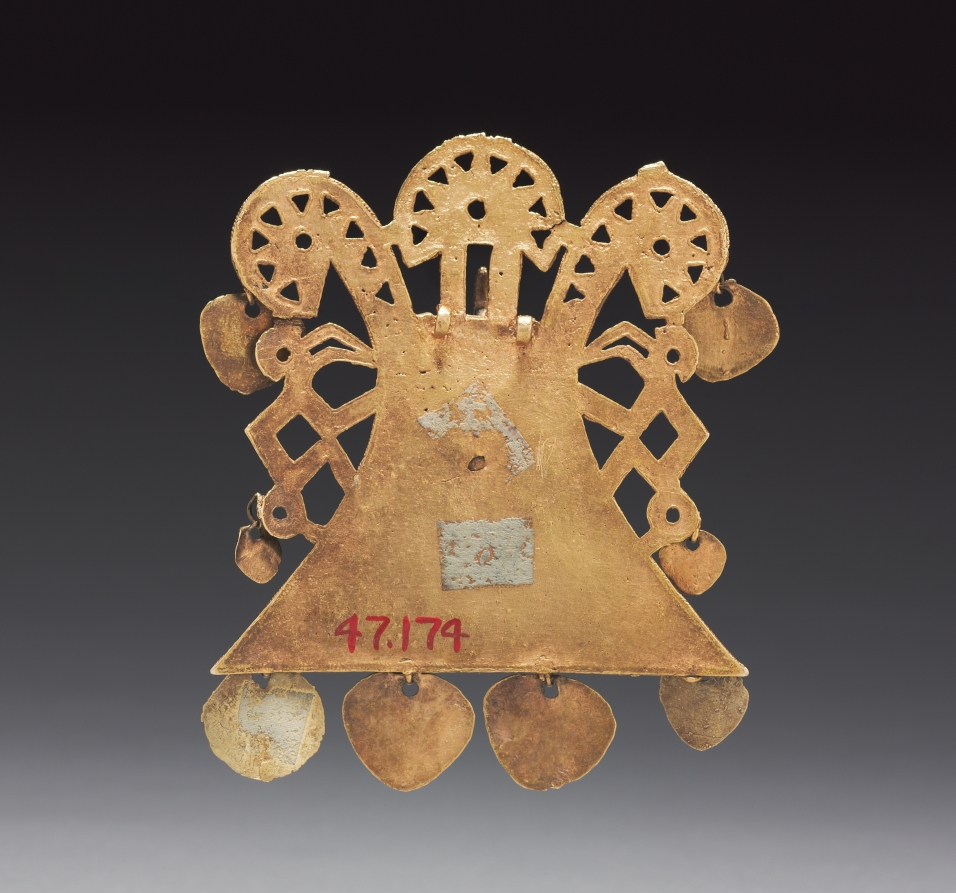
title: Bird Pendant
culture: Colombia, Muisca style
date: c. 900–1550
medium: cast gold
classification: Metalwork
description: This elaborate bird pendant was worn. It features delicate herringbone moldings, open-work patterns, and wing details-all part of the wax model from which the pendant was cast using the lost-wax process. The dangles were attached after casting.